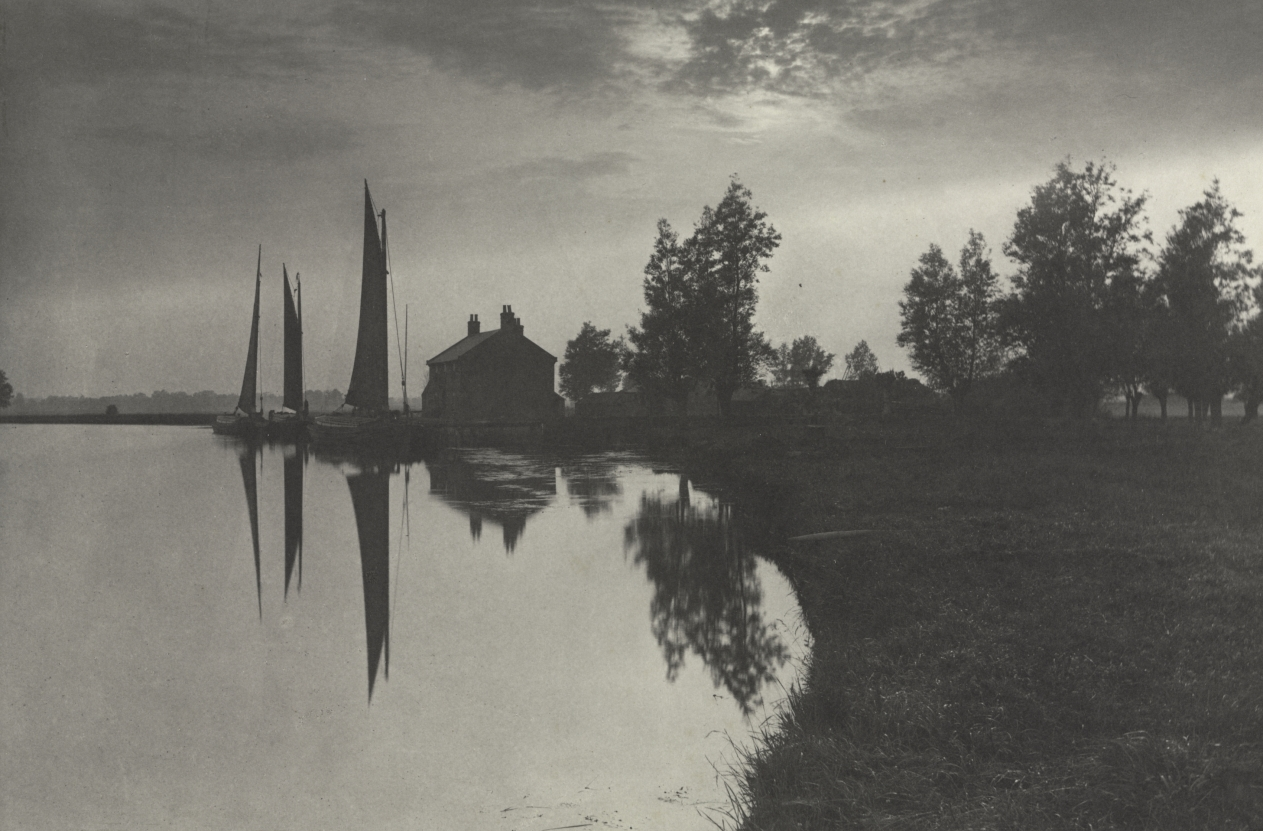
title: Cantley: Wherries Waiting for the Turn of the Tide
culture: England, 19th century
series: Life and Landscape on the Norfolk Broads, pl. XXIV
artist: Peter Henry Emerson (British, 1856–1936)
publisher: Sampson Low, Marston, Searle and Rivington (with T.F. Goodall)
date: 1886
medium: platinum print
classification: Photograph